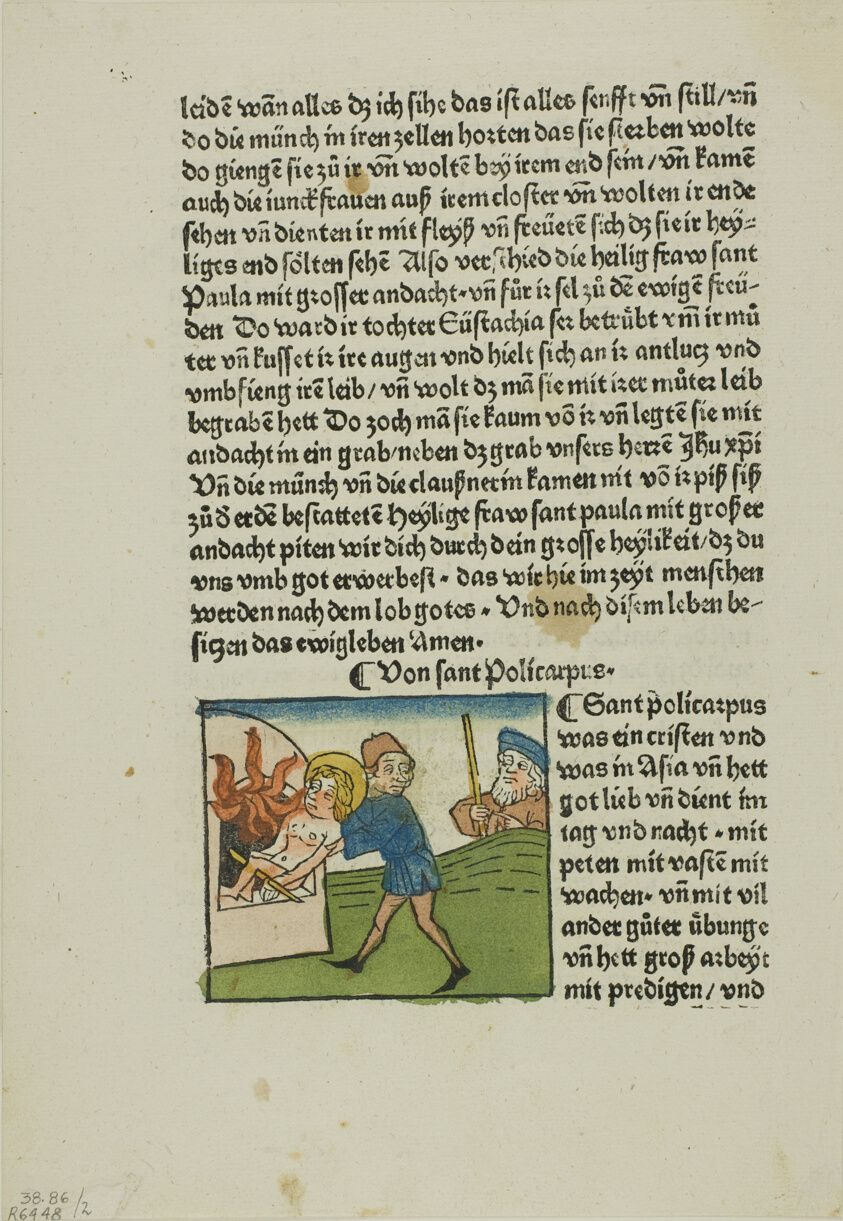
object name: Print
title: Saint Policarpus from Lives of the Heiligenleben, Sommerteil (Saints, Summertime), Plate 2 from Woodcuts from Books of the 15th Century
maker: Unknown Artist (Augsburg, 15th century); printed and published by Johannes (Hans) Baemler (German, 1435-1504); original text by Jacobus de Voragine (Italian, c. 1230–1298); portfolio text by Wilhelm Ludwig Schreiber (German, 1855–1932)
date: 1475, portfolio assembled 1929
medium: Woodcut in black with hand-colored additions, and letterpress in black (recto and verso), on cream laid paper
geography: Germany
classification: woodcut; print; prints and drawing